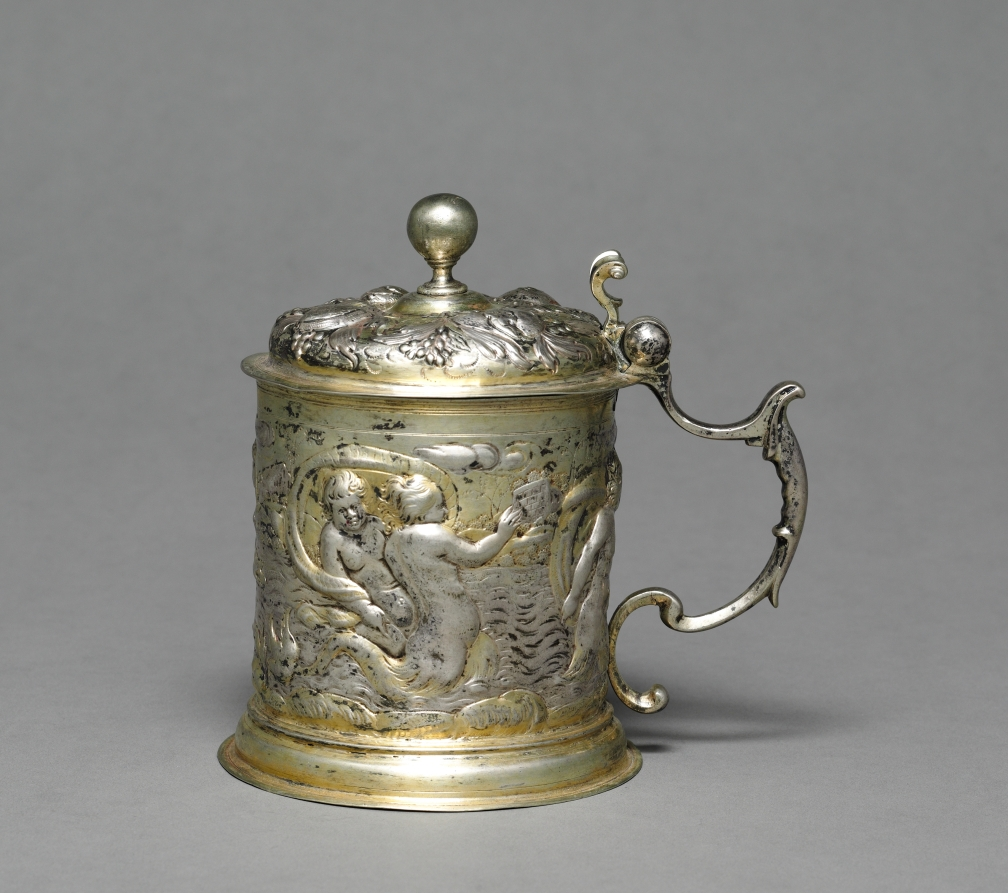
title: Tankard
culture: Germany, Augsburg, 17th century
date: c. 1680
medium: silver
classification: Silver